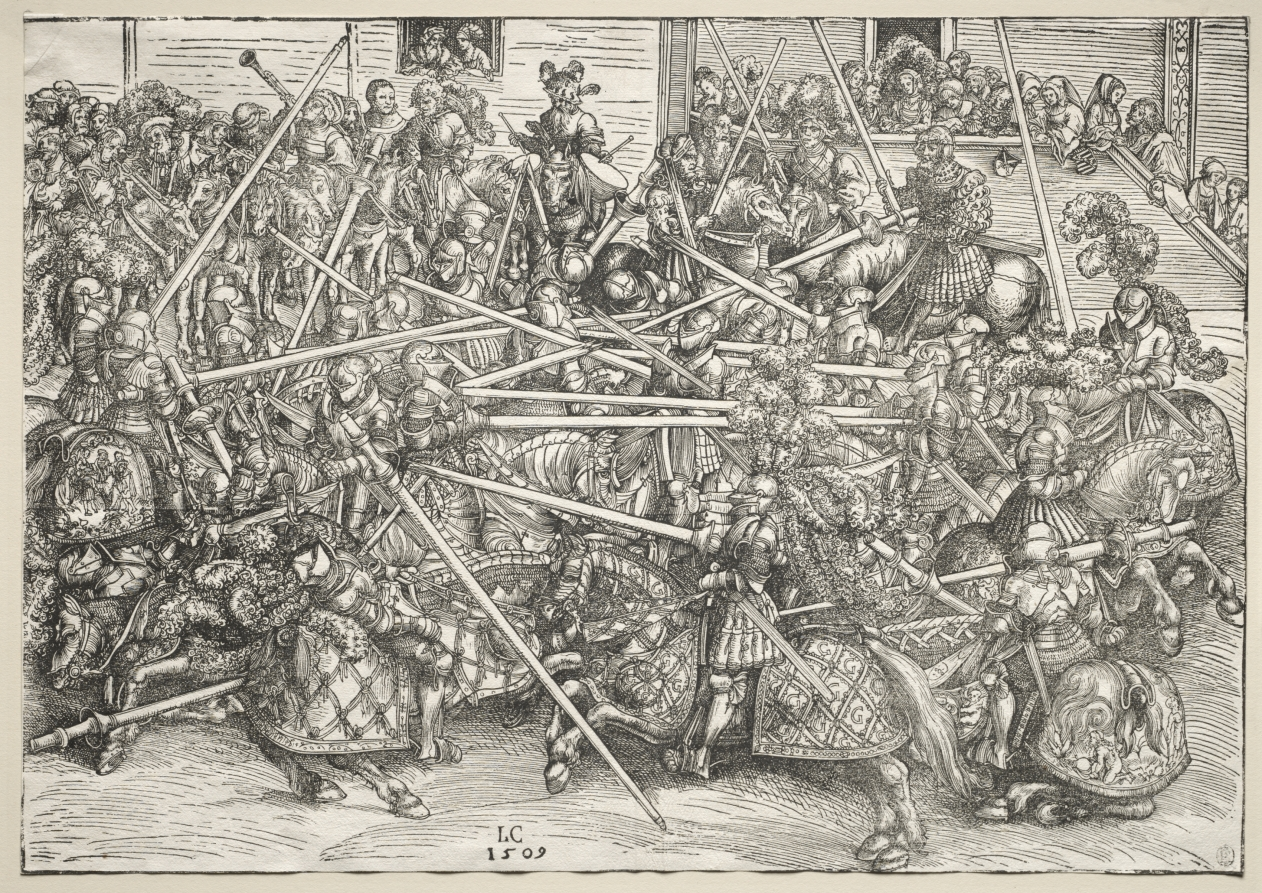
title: The Tournament with lances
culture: Germany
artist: Lucas Cranach (German, 1472–1553)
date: 1509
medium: woodcut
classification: Print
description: Group engagements fought between two teams of contestants gained favor during the 1500s. These mêlées were often confused and chaotic, as shown in this woodcut. Lucas Cranach the Elder sketched many tournament scenes, often transferring them in faithful detail to woodblocks.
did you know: While the tilt was the most popular type of jousting in the 1500s, the mêlée remained in favor and often formed the climax of the greatest tournaments.